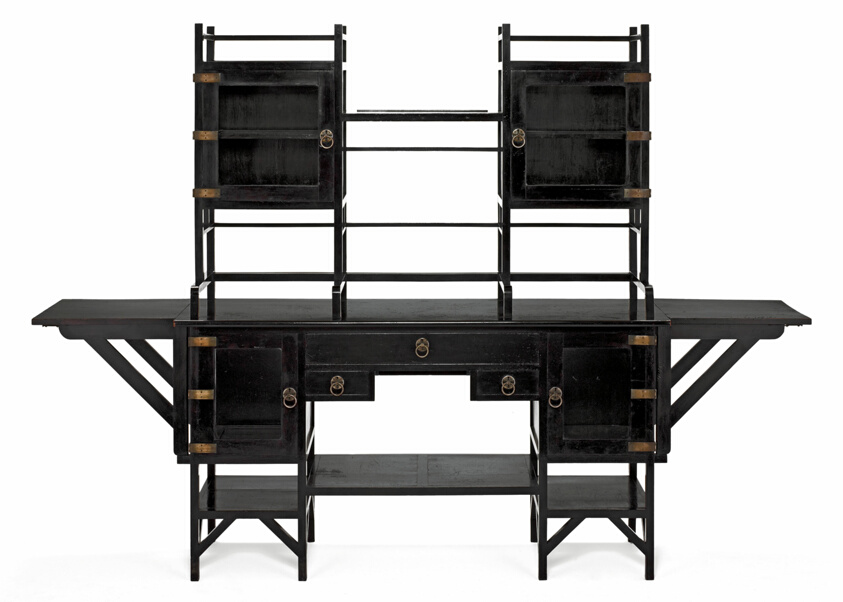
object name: Furniture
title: Sideboard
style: Aesthetic Movement, Arts and Crafts Movement, japonism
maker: Designed by Edward William Godwin; English, 1833-1886; Made by William Watt; English, 1834-1885; London, England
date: Designed 1867, made c. 1876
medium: Ebonized mahogany with glass and silvered brass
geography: England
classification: sideboard (furniture); case furniture; furniture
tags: furniture